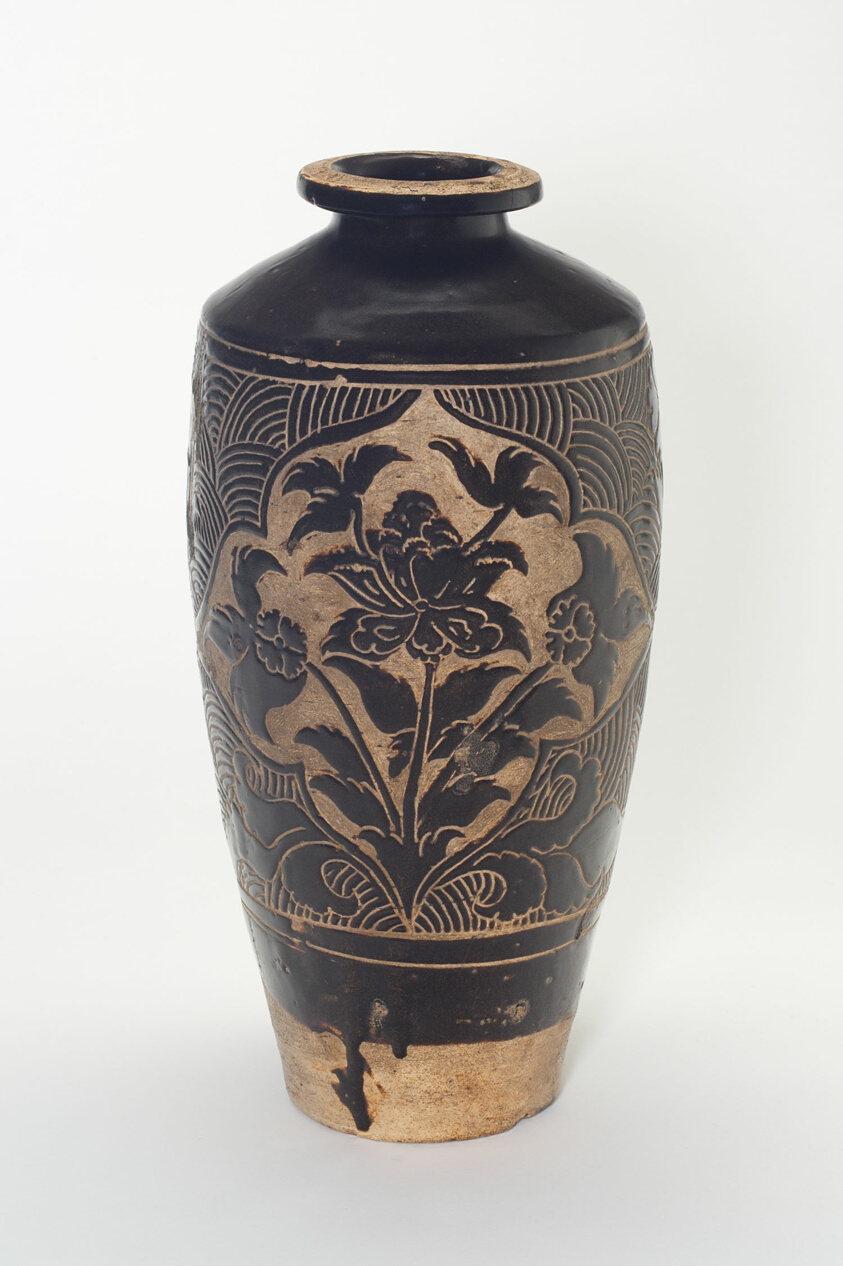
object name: Vessel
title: Bottle Vase (Meiping) with Flowers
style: Chinese (culture or style)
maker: China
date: Xixia Kingdom (1038–1227), 12th/early 13th century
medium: Cizhou-type cut-glaze ware; stoneware with dark iron brown glaze and cut and incised decoration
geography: China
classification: vase; vessel; stoneware; ceramics; asian art